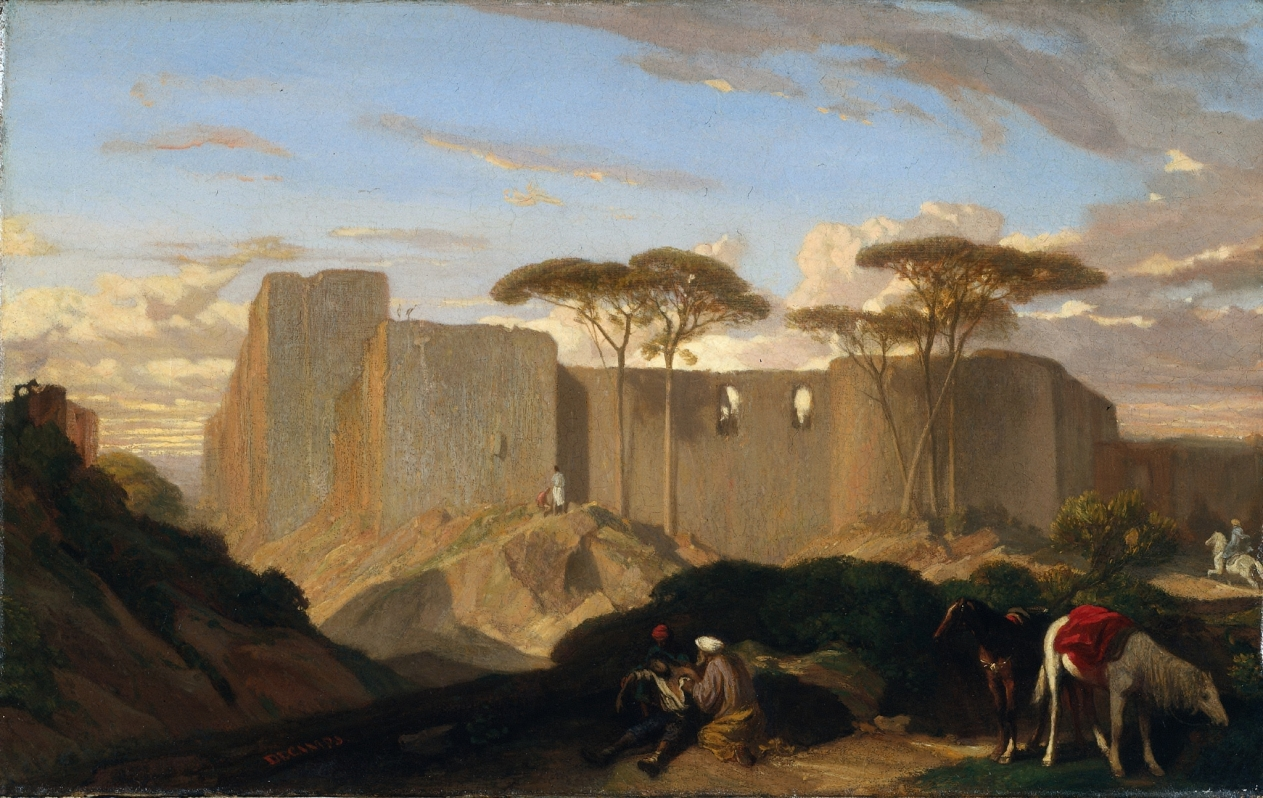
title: The Good Samaritan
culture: France, 19th century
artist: Alexandre-Gabriel Decamps (French, 1803–1860)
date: c. 1842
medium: oil on fabric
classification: Painting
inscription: Signed in lower left in red: decamps